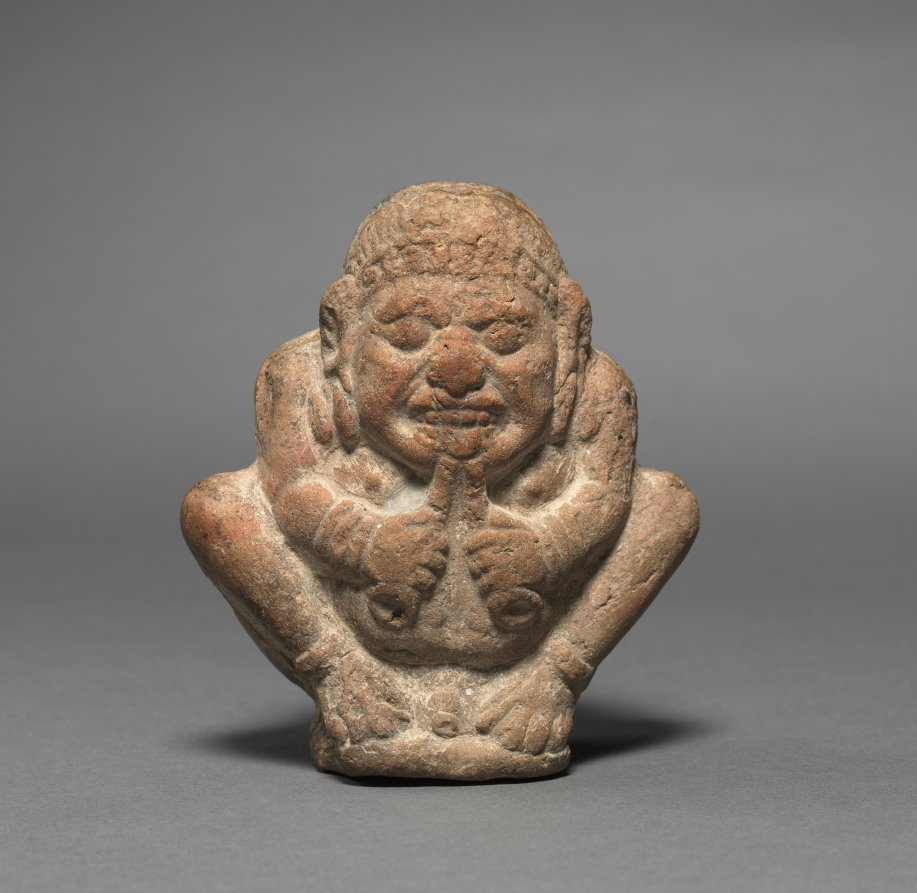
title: Crouching Dwarf Musician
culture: India, Shunga period (185–78 BCE)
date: 200–100 BCE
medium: terracotta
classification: Sculpture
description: Images of dwarfs referenced the fertility of the earth. With lush curling hair, portly full body, and visible genitals, this figure squats close to the earth and plays on a double flute pipe instrument.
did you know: Two holes at the top and bottom of the figure indicate that this object worked as a whistle.